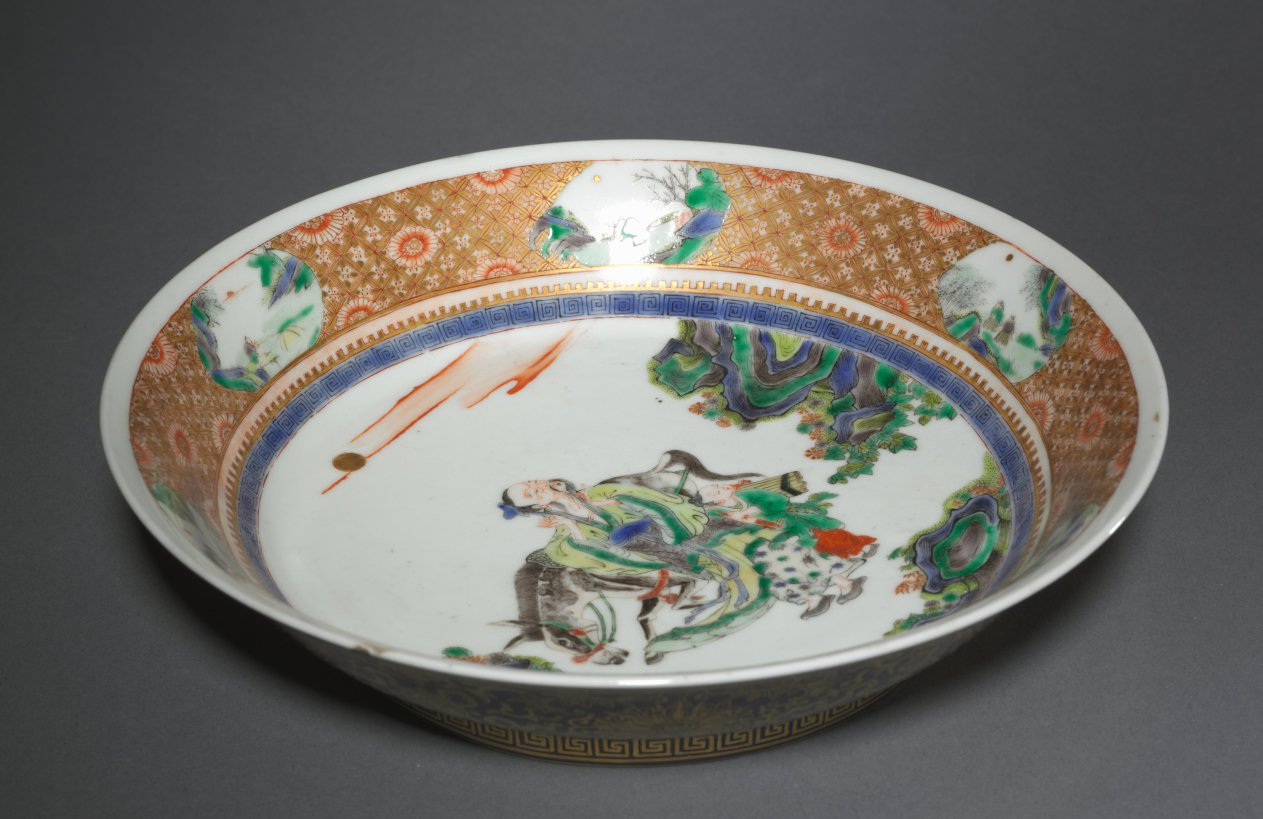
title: Dish with Zhang Guolao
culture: China, Jiangxi province, Jingdezhen kilns, Qing dynasty (1644-1911), Kangxi reign (1662-1722)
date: 1662–1722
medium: porcelain with famille verte overglaze enamel and painted gold decoration (interior) and powder blue glaze with painted decoration (exterior)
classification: Ceramic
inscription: 大清康熙年製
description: Zhang Guolao, featured on this dish, is one of the Eight Immortals and a gifted magician who was believed to know the secret arts to obtain longevity. Typically depicted as an old man and accompanied by his mule, he is the patron saint of artists. His mule is said to be magical; it can be folded up like a piece of paper to fit into a small bag. The central scene is framed by a sumptuously gold-decorated rim showing spaces reserved for landscape scenes in primarily fresh blue and green colors.